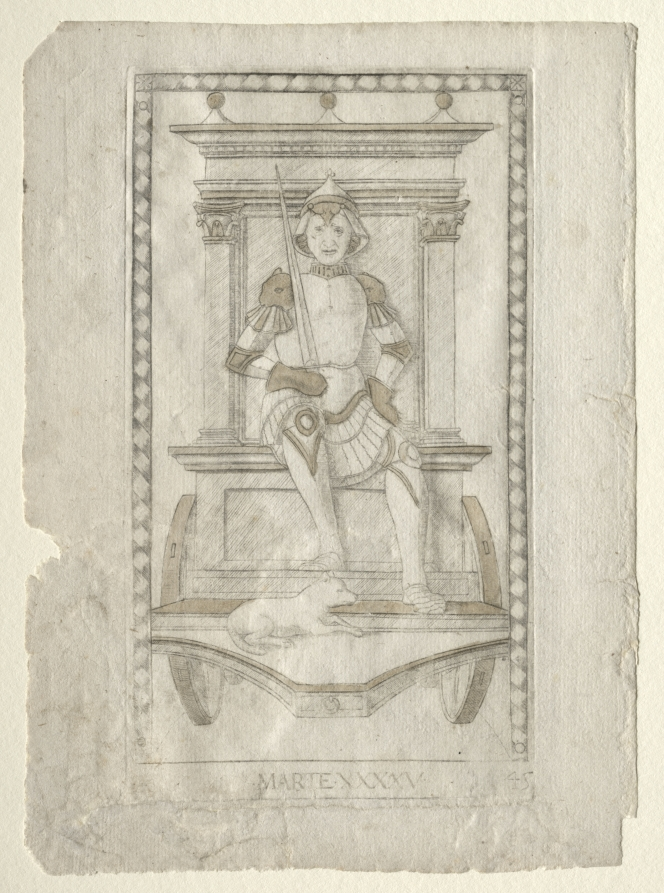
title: Mars (from the Tarocchi, series A: Firmaments of the Universe, #45)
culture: Italy, Ferrara, 15th century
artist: Master of the E-Series Tarocchi (Italian, active 1460s)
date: before 1467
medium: engraving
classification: Print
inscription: Lettered below the image of Marte (Mars): [A] / ·MARTE·XXXXV· / 45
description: This engraving is part of the Tarocchi group marked with the letter “A”, and named Firmaments of the Universe. This series comprises the seven planets from the classical astronomy (Moon, Mercury, Venus, Sun, Mars, Jupiter, Saturn) and the three celestial spheres that separate them from the Supreme Entity (Prima Causa) from which everything was originated. Here, Marte (Mars) is personified as a full-length male figure, in frontal view, and seated on a chariot-like throne. Mars is armored and holds up a sword in his right hand. A wolf lays at his feet.